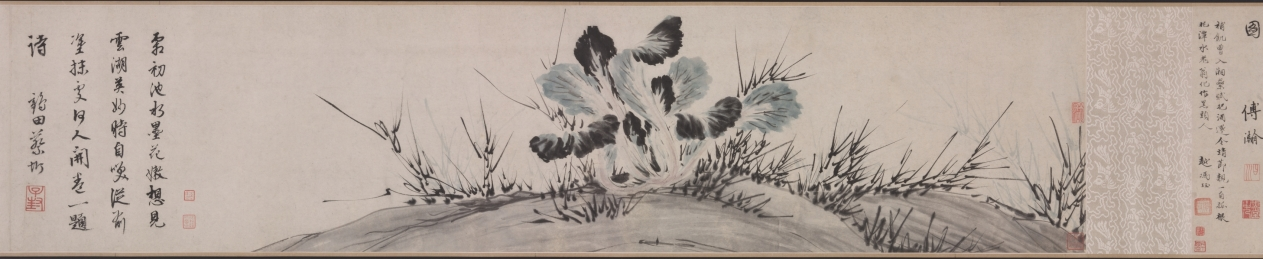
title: Chrysanthemums and Cabbage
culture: China, Ming dynasty (1368–1644)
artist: Tao Cheng (Chinese, active c. 1471–after 1502)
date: c. 1486 or before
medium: handscroll, ink and slight color on paper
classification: Painting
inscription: Artist's seal at beginning of painting: Yun hu 雲湖. Title by Wang Wenzhi 王文治 (1730–1802), date 1756. 2 seals of Wang Wenzhi 王文治 (1730-1802); 3 seals of Ku Yün (n. d.)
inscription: Section A (Chrysanthemums): 1 poem and 1 seal of Zhang Yuanzhen 張元禎 (1437–1507) - Jinshi, 1461; 1 poems and 3 seals of Ni Yue 倪岳 (1444–1501) - Jinshi, 1464; 1 poems and 2 seals of Zhao Xiang 趙祥 (life dates unknown) - Jinshi, 1469; 1 poems and 1 seals of Wu Xixian 吳希賢 (1437–1489) - Jinshi, 1464; 1 poems and 1 seals of Lü Chang 呂㦂 (1449–1511) - Juren, 1471; 1 poems and 3 seals of Fu Han 傅瀚 (1435–1502) - Jinshi, 1464; 1 poems and 1 seals of Feng Jue 馮珏 (life dates unknown) - Jinshi, 1478.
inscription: Chrysanthemums section, poem 1, by Zhang Yuanzhen 張元禎 (1437–1507): Several bushes of chrysanthemums grow in front of the Five-Willow Cottage,/ The yellow ones are really yellow and the white ones white./ This affable and decent fellow, young in years and unsophisticated,/ Has snapped one of the branches to dip in ink. (The Five-Willows Cottage was the home of the poet Tao Qian 陶潛 (Tao Yuanming 陶淵明, AD 365-427).) Chrysanthemums section, poem 2, by Ni Yue 倪岳 (1444–1501): Where at the Eastern Fence can you grieve for the Soul of the Xiang River?/ A man of upright character is mourned within the traces of ink./ White jade with a slight flaw would be a grievance forever,/ Later men should understand why even the roots of the flowers are washed. (Eastern Fence refers again to the poet Tao Qian 陶潛, while the Soul of the Hsiang River refers to the poet Qu Yuan 屈原 (c. 340–278 BC).) Chrysanthemums section, poem 3, by Zhao Xiang 趙祥 (life dates unknown): A clump of chrysanthemum grows in front of the bamboo pavilion,/ The winds of many autumns have blown since we parted beyond the river./ Straining wine through the official's cap of Tao [Qian] to prolong autumn's pleasures,/ The mists and clouds of ten thousand miles belong to the intoxicated. Chrysanthemums section, poem 4, by Wu Xixian 吳希賢 (1437–1489): It is a different spring if mulberry is planted during the latter part of the year,/ The dust of the world originally did not drop on clothing./ Who spills out ink under the Eastern Fence/ And paints so freely this portrait of chrysanthemums for the venerable Sir Tao? Chrysanthemums section, poem 5, by Lü Chang 呂㦂 (1449–1511): This full tray of ink for painting [flowers] at the Eastern Fence;/ Their whiteness or yellowness is not essential in capturing their beauty./ I don't have to go to Jiangnan to see them myself./ At my old house grow two or three branches. Chrysanthemums section, poem 6, by Fu Han 傅瀚 (1435–1502): Who daubed autumn flowers with ink/ As if they were dark dew on a branch tip only vaguely seen at evening?/ After the lazy clouds disperse, no one paints;/ A certain unconventionality pervades this painting. Chrysanthemums section, poem 7, by Feng Jue 馮珏 (life dates unknown): To satisfy his hunger, [the chrysanthemums] have at times entered the poetry of Qu Yuan;/ Taking up the wine cup, it felt close to Tao Qian./ [With them I am like] a lonely root sustained by deep water/ Or an old man to whose hair the color of youth returns.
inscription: Section B (Cabbage): 1 poem and 1 seal of Cai Qi 蔡圻 (life dates unknown) - degree information not known; 1 poems and 3 seals of Ni Yue 倪岳 (1444–1501) - Jinshi, 1464; 1 poem and 3 seals of Jiao Fang 焦芳 (1436–1517) - Jinshi, 1464; 1 poem and 3 seals of Li Dongyang 李東陽 (1447–1516) - Jinshi, 1464; 1 poems and 1 seals of Wu Xixian, signed “Xixian” 吳希賢 - Jinshi, 1464; 1 poems and 3 seals of Fu Han 傅瀚 (1435–1502) - Jinshi, 1464; 1 poems and 1 seals of Lü Chang 呂㦂 (1449–1511) - Juren, 1471; 1 poems and 2 seals of Zhao Xiang 趙祥 (life dates unknown) - Jinshi, 1469; 1 poems and 1 seals of Feng Jue 馮珏 (life dates unknown) - Jinshi, 1478.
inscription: Cabbage section, poem 1, by Cai Qi 蔡圻 (life dates unknown): The ink splashes are fresh from a frosty brush dipped in pond water;/ I can visualize that time when Yunhu 雲湖 [Tao Cheng] first showed his talents./ I lament the places where I scribbled before,/ Who would open them to inscribe a poem? (The first line is an allusion to the famous Jin dynasty calligrapher Wang Xizhi 王羲之 (AD 303-361), who practiced calligraphy so diligently at the edge of a pond that the water turned black with ink.) Cabbage section, poem 2, by Ni Yue 倪岳 (1444–1501): After rain the vegetables begin to grow;/ How are the colors of the masses lately!/ Once you get used to them, the tastiest parts are the ends of the roots;/ I don't know if they can be used for "seasoning soup." ("Seasoning soup" is an allusion to the statesmanship of a chief minister.) Cabbage section, poem 3, by Jiao Fang 焦芳 (1436–1517): This crop of purple stalks and green leaves is late and irregular;/ Now the rainy season is over for the Eastern Garden./ All the nobles nowadays dine on meat;/ Who of them knows the flavor of this [cabbage]. Cabbage section, poem 4, by Li Dongyang 李東陽 (1447–1516): It's always helped the honest man to sober up after drinks./ I intend to go to the deepest part of the stream-crossed garden/ To refresh myself in the fragrance and dew of evening. Cabbage section, poem 5, by Wu Xixian 吳希賢 (1437–1489): After rain, the white silk is filled with fragrant vegetables;/ How many times this happens in Mr. Tao's paintings./ On whom will you depend to present a memorial to the ruler?/ Don't let this color emerge on the faces of the people. (The last line is meant as a warning to officials: the color of the vegetables (green) may be pleasing in itself, but when it emerges on the faces of the starving poor, it signifies a badly governed world.) Cabbage section, poem 6, by Fu Han 傅瀚 (1435–1502): For twenty years I have feasted on the excellent mutton of an official;/ Yet I talk and dream about the garden and its vegetables./ Do not merely say it is good to chew the root of the cabbage--/ You must taste to understand what poverty is. Cabbage section, poem 7, by Lu Chang 呂㦂 (1449–1511): The capital is never a place for an apprentice in the "garden of scholarship."/ Who would write about gardens and vegetables on an examination paper?/ I've walked throughout the country in spring;/ Make sure the people don't show this color. Cabbage section, poem 8, by Zhao Xiang 趙祥 (life dates unknown): After a wash of rain, the spring garden is still in order;/ The flavor [of the cabbage] is more suitable with a small drink and the hum of a tune./ The rich and powerful in their mansions consume dish after dish of meat;/ Vegetarian food is known only by the scholars. Cabbage section, poem 9, by Feng Jue 馮珏 (life dates unknown): A new cabbage is nourished with dew;/ It takes a long time to grow and mature./ The business of "seasoning the soup" is your responsibility;/ Better command the gardener to take care [of the cabbages]. trans. HK/LYSL/WKH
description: On an autumn day in Beijing, Tao Cheng had a gathering with a group of scholar-officials and created two paintings in a spontaneous, casual style. The first depicts chrysanthemums, slender bamboo stalks, and a rock in monochrome ink. Tao applied light colors for the second painting that depicts cabbage. Tao deliberately placed the images on the first sections of the paper so that his honorable guests could add their poetic inscriptions inspired by his imagery. In the first section to the right, all seven poetic inscriptions refer to the beloved poet and recluse Tao Qian (also called Tao Yuanming, AD 365–427) who was particularly known for his profound love for chrysanthemum flowers. Most of the inscriptions in the second section express sympathy for the poor, since cabbage is the main ingredient in their humble food. Taken together, the poems and paintings allude to the life and responsibilities of the scholar-official: the importance of both an upright character and a concern for the poor citizens in order to achieve good government.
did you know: Eminent calligrapher Wang Wenzhi 王文治 was only 27 sui when he wrote the title in 1756.